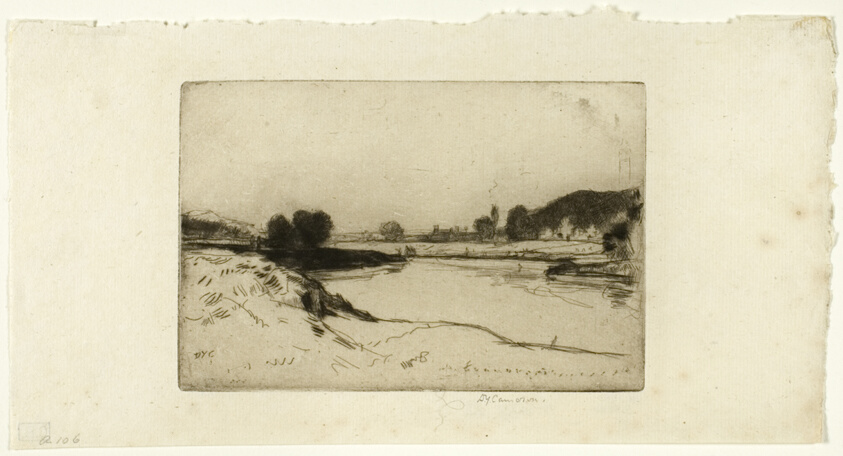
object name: Print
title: The Forth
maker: David Young Cameron (Scottish, 1865-1945)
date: 1904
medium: Etching and drypoint on ivory laid paper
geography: Scotland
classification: etching; print; prints and drawing